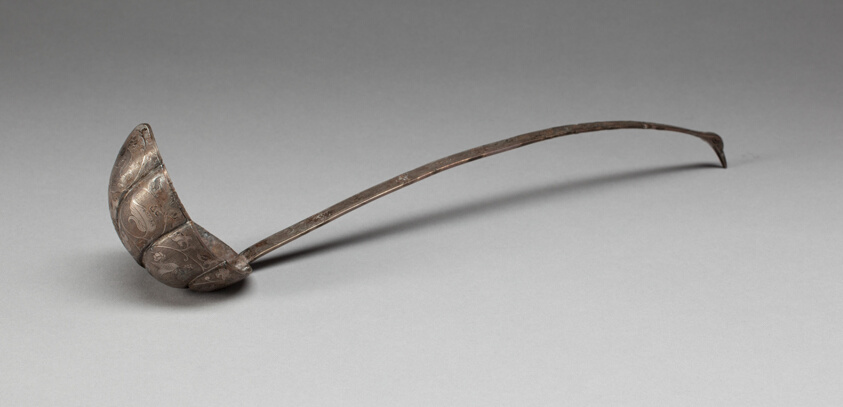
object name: Decorative Arts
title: Ladle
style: Chinese (culture or style)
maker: China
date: Tang dynasty (618–907), first half of 8th century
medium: Beaten silver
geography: China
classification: silver; metalwork; asian art; decorative arts